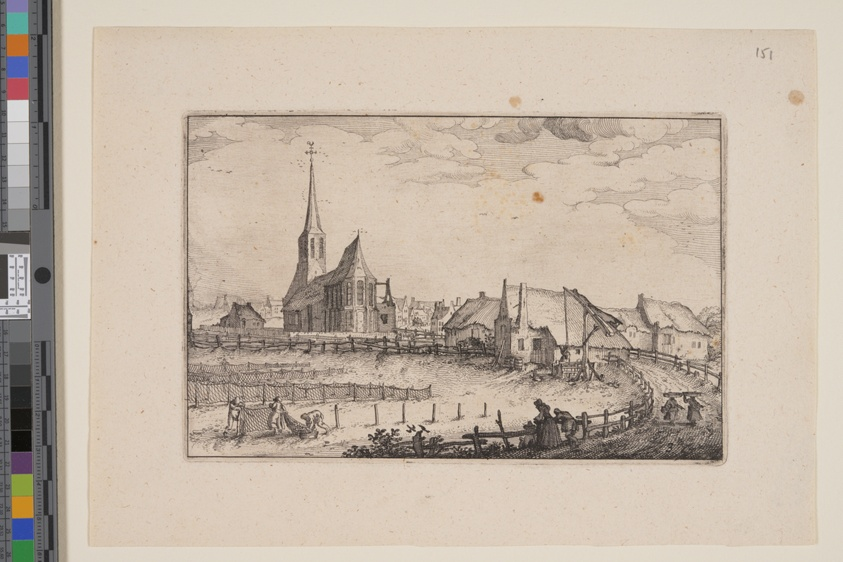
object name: Print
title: The Village Zandvoort, from Views in the Surroundings of Haarlem (Plaisante Plaetsen)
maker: Claes Jansz. Visscher (Netherlandish, c. 1550–c. 1612)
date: 1610/20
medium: Etching on ivory laid paper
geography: Netherlands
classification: print; paper; prints and drawing; etching